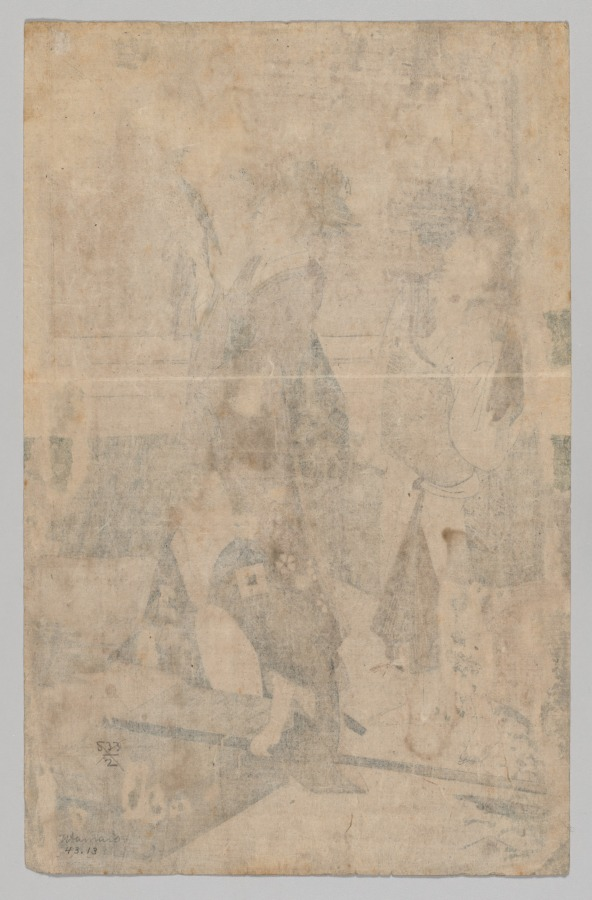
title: Daimyō and his Retinue Crossing a Stream in Plain Near Fuji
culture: Japan, Edo period (1615–1868)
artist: Kitagawa Utamaro (Japanese, c. 1754–1806)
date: 1753–1806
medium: color woodblock print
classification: Print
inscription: Signature: Utamaro fude Publisher Mark: Tsuruya Kiyeimon